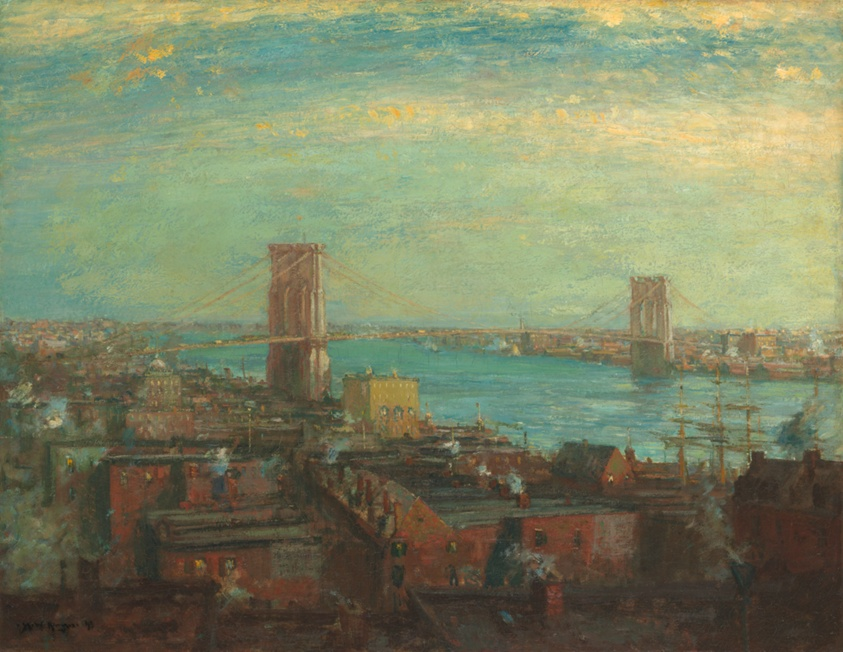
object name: Painting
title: Brooklyn Bridge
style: Impressionism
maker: Henry Ward Ranger (American, 1858–1916)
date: 1899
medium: Oil on canvas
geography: United States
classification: painting; american arts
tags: cityscapes, Century of Progress, world's fairs, Chicago World's Fairs, architecture, landscapes